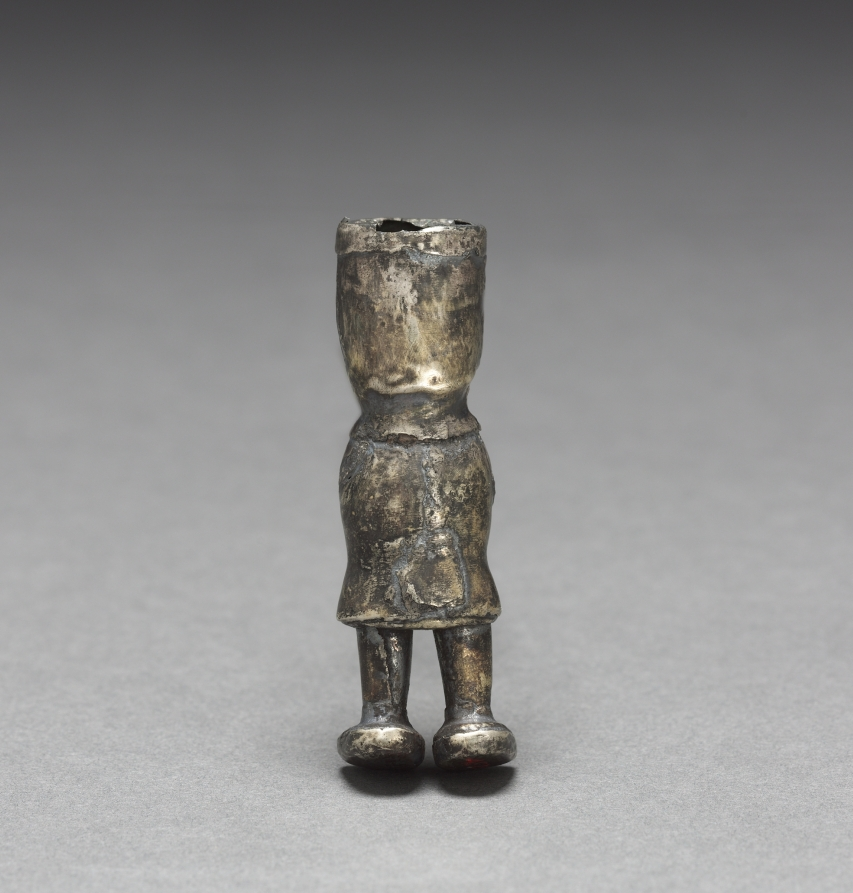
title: Figure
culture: Peru, Lambayeque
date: 1000–1532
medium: silver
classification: Metalwork